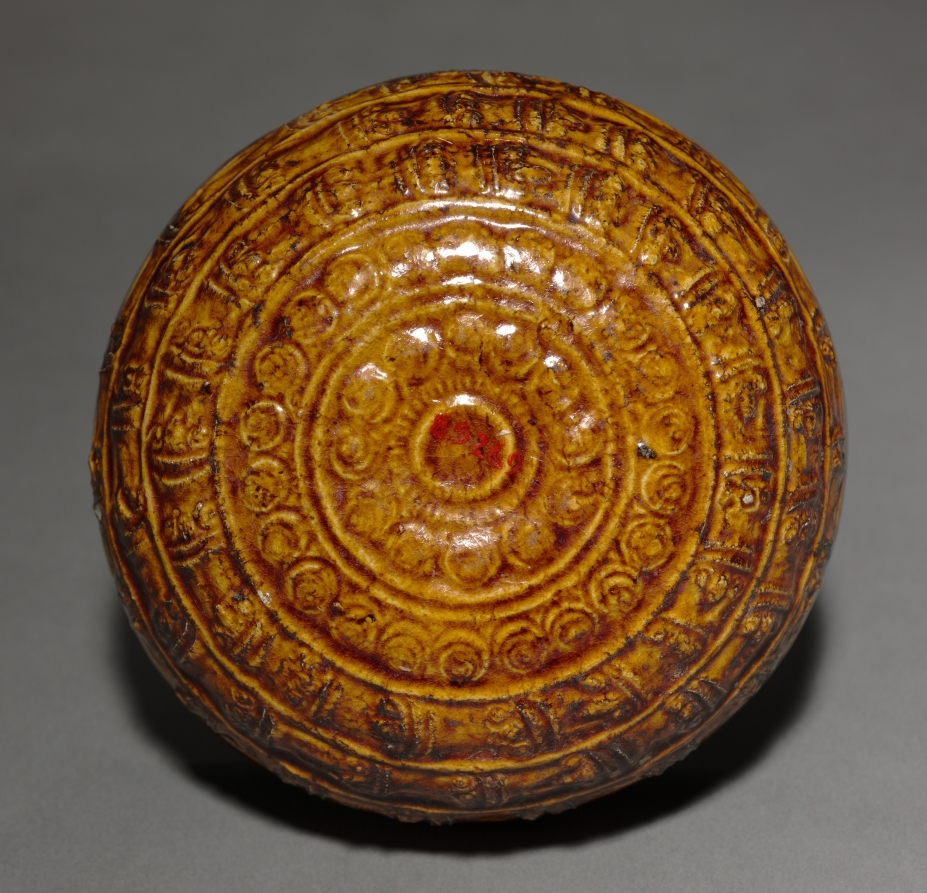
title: Bowl with Bands and Spirals in Relief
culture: China, Tang dynasty (618-907)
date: late 600s–early 800s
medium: glazed earthenware with molded decoration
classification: Ceramic